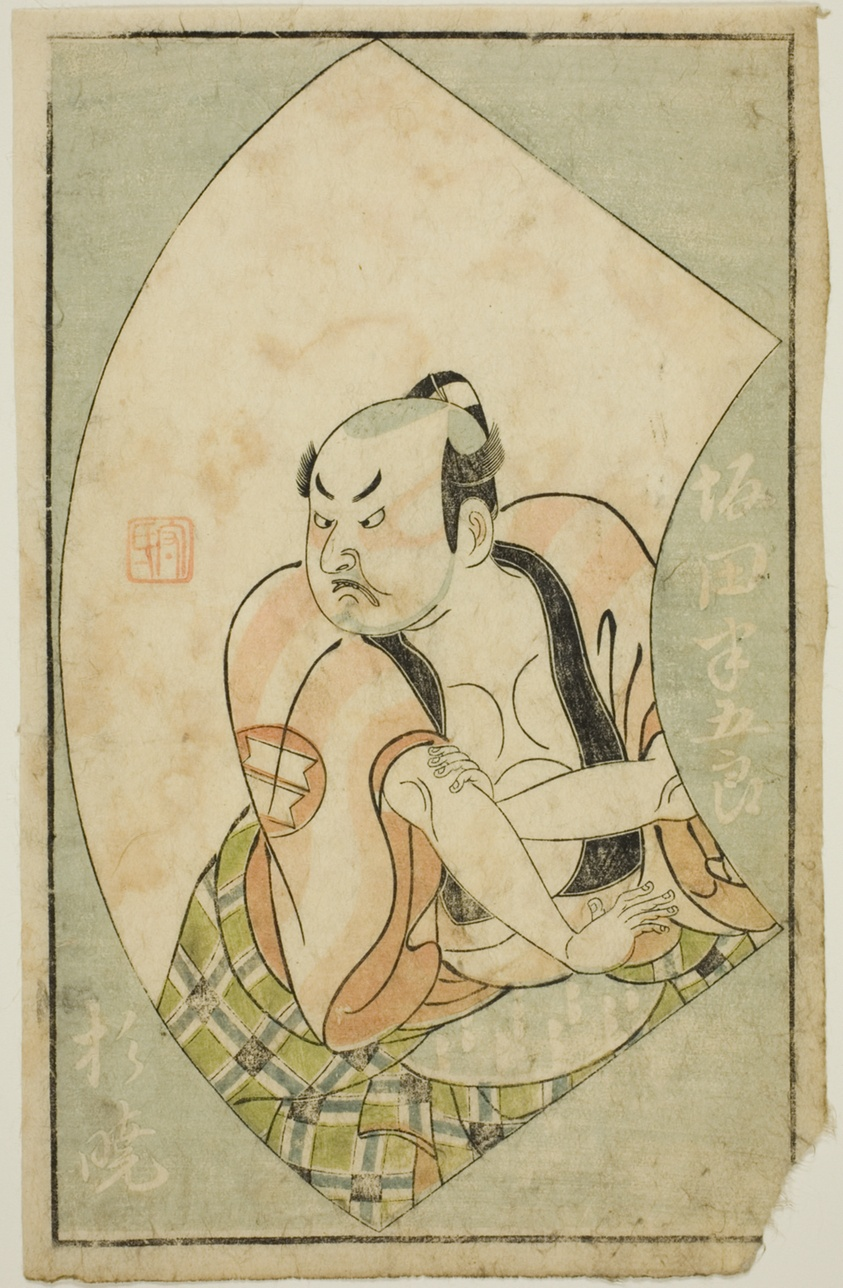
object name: Print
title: The Actor Sakata Hangoro II, from "A Picture Book of Stage Fans (Ehon butai ogi)"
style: Japanese (culture or style)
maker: Ippitsusai Buncho (Japanese, active c. 1755-90)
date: 1770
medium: Color woodblock print; page from illustrated book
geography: Japan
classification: woodblock print; print; asian art